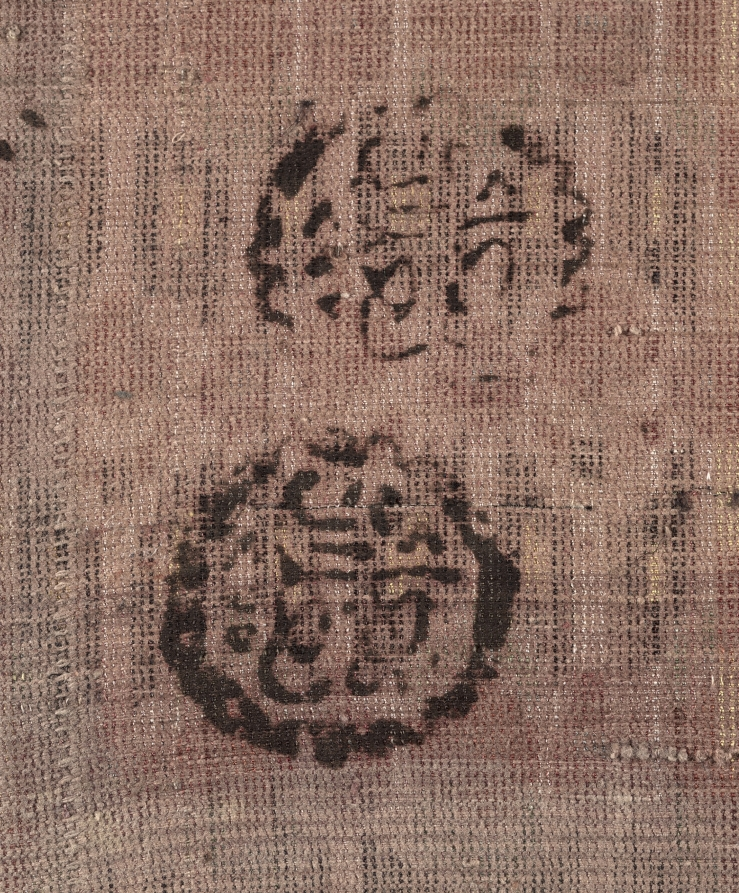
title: Velvet Panel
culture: Iran, 19th century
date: 1800s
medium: velvet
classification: Velvet